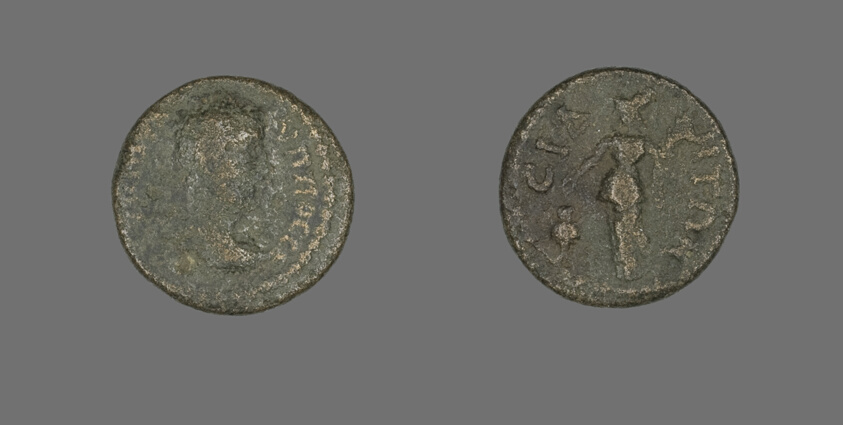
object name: Coin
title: Coin Portraying King Philip I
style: roman (ancient, style or period), ancient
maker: Roman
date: 244-249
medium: Bronze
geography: Roman Empire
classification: coin; ancient art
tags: king